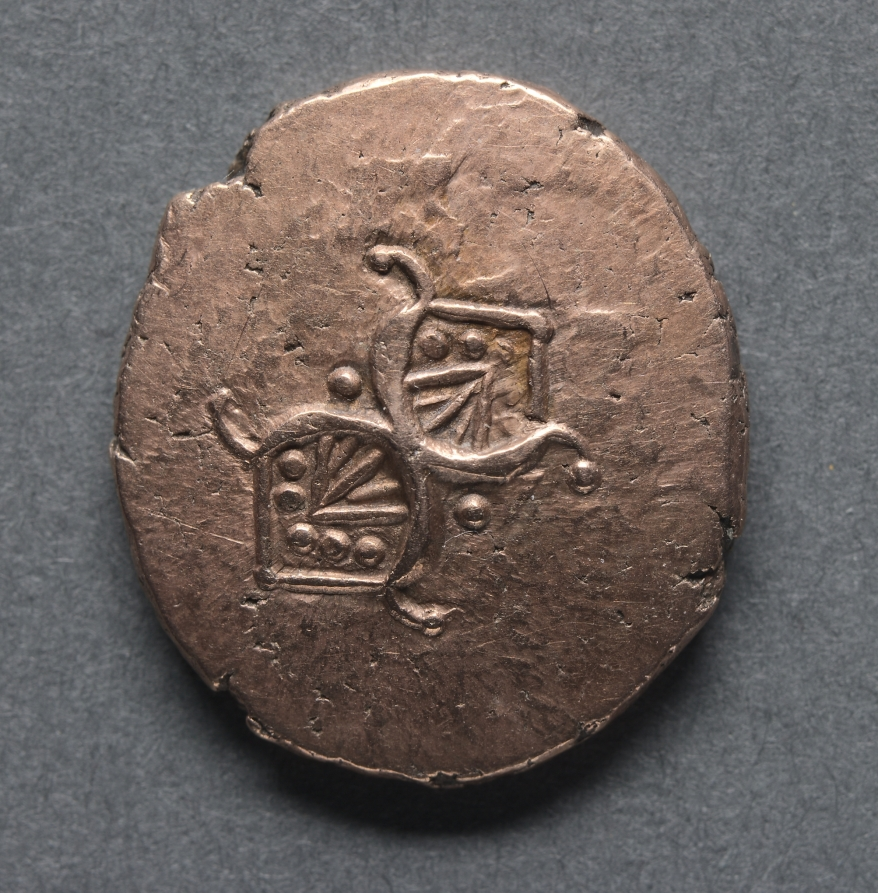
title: Addedomaros Stater: Horse, Branch, and Spiral Sun (reverse)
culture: England, Catuvellauni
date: 50 BCE–10 CE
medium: gold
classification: Coins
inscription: "AD[D]ED O[MAROS]."